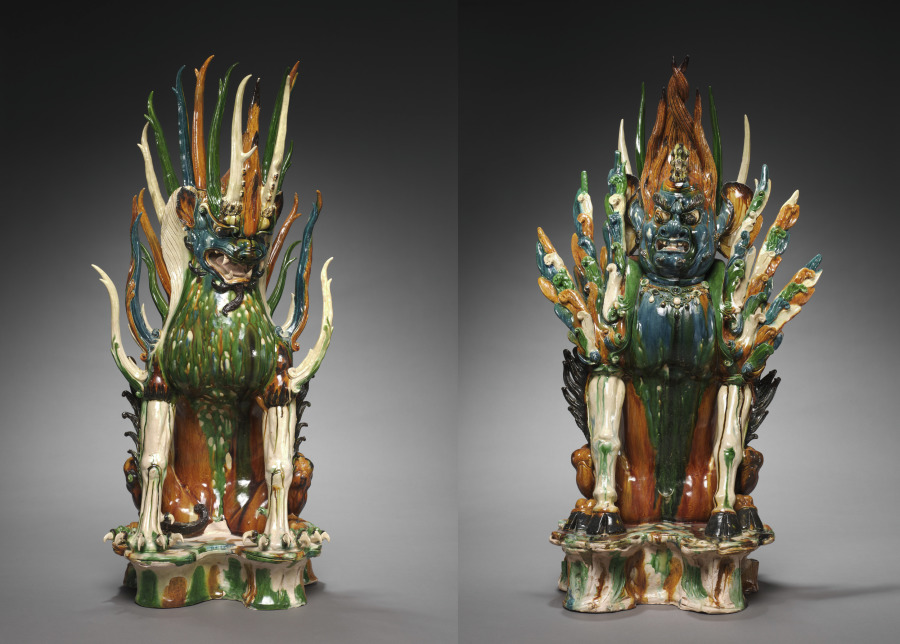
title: Tomb Guardians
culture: China, probably Shaanxi province, Xi'an, Tang dynasty (618-907)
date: early 700s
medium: glazed earthenware, sancai (three-color) ware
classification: Ceramic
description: With fierce expressions, elongated spikes, and exaggerated physical features, these two fantastic creatures were intended to guard the entrance to a tomb, warding off evil as well as keeping the soul of the deceased from wandering. Known as qitou, or earth spirits, both sculptures differ in appearance: one has an animal face, claws, and a pair of antlers; the other sports a human face with huge ears, hooves, and a short horn.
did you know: Sancai (three-color) glazes in green, amber, and transparent white, plus expensive cobalt blue glaze, show the high social status of the tomb’s occupant.